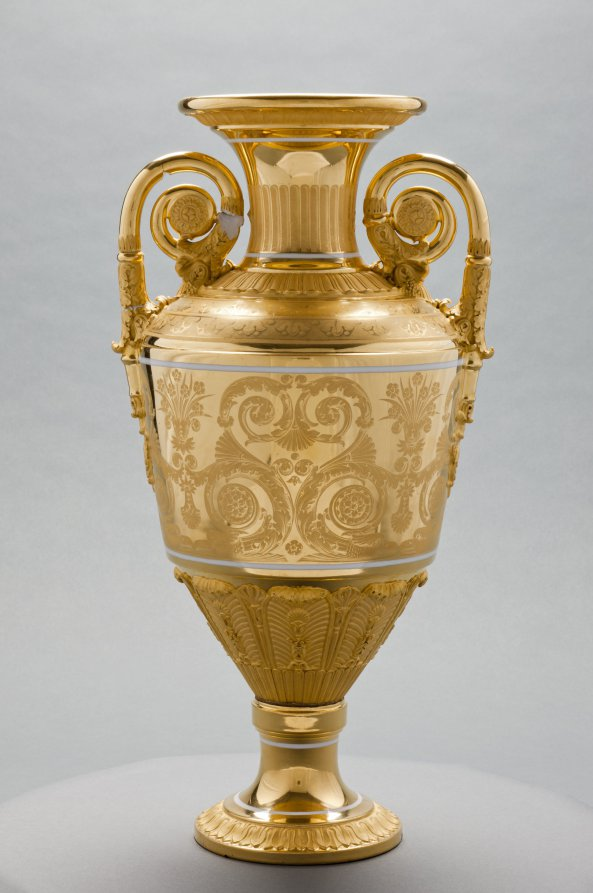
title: Vase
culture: Russia, St. Petersburg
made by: St. Petersburg Imperial Porcelain Factory (Russian)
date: c. 1820–1830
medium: gilt porcelain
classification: Ceramic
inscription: inscribed: "Moreau" in gold near lip.